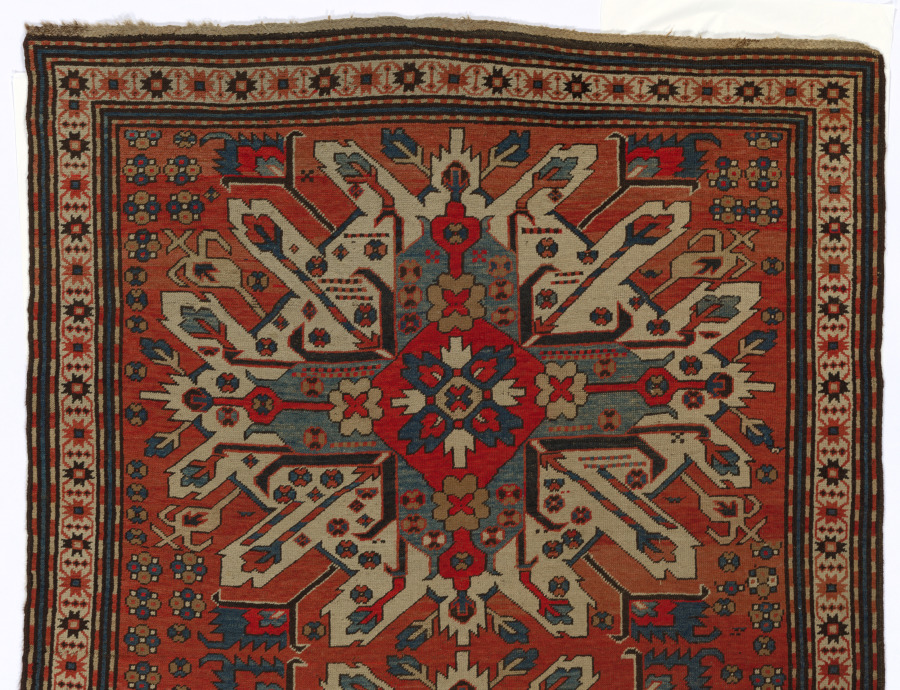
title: Carpet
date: 1800–1850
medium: Undyed wool: ground warp; dark brown wool: ground weft; dyed wool (polychrome): Ghiordes knotted pile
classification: Carpet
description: Nomadic groups, who moved across the grasslands and steppes between the Caucasus regions near the Caspian Sea to Central Asia and China, perfected the making of textiles, carpets, and other movable works of art. Carpets were woven from sheep’s wool to be strong and thick, and served as protection from the elements. This example is decorated with a double geometric sunburst motif.